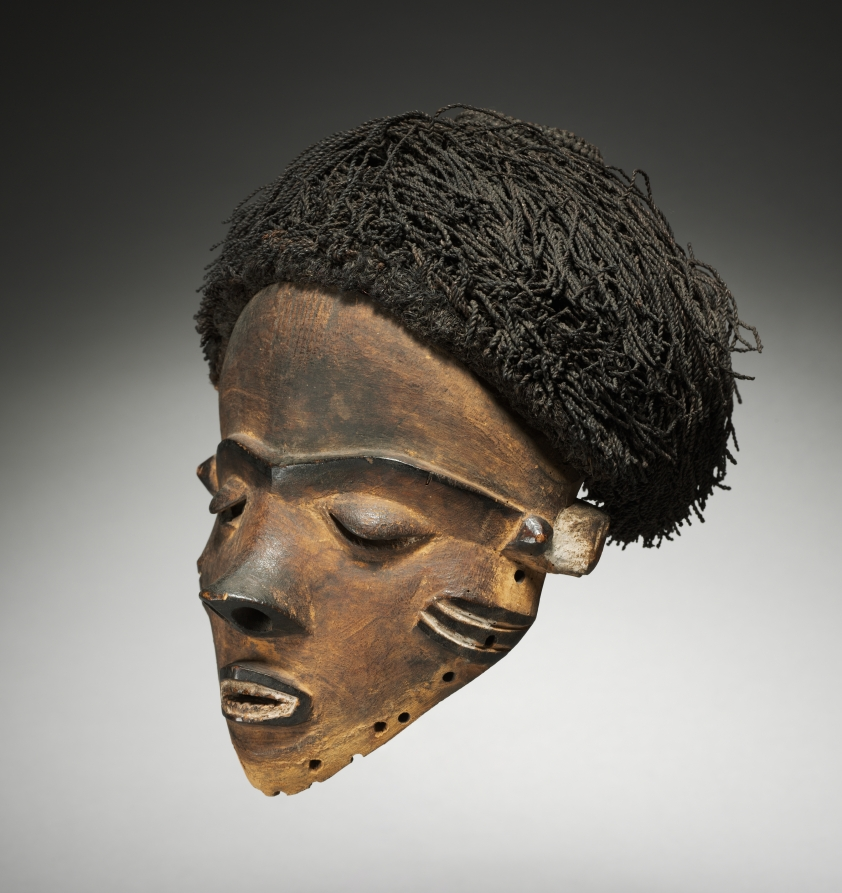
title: Female Mask (Gambanda or Kambanda)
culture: Africa, Central Africa, Democratic Republic of Congo, Pende-style maker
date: early 1900s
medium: Wood, plant fiber, and colorant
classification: Mask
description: Realized in typical Central Pende style, this mask is believed to represent gambanda, the chief's wife. In light of Pende theories about gender and physiognomy, the mask is an ideal expression of a woman's facial features and thus reflects her calm, obedient, peaceful, and self-controlled demeanor. The intricate hairstyle consisting of hundreds of miniature twists imitates a once fashionable hairdo. Pende sculptors inherited their position and often worked on the outskirts of the village so that few could see them at work.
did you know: This female mask would have performed in a collective multimedia event with audience participation.